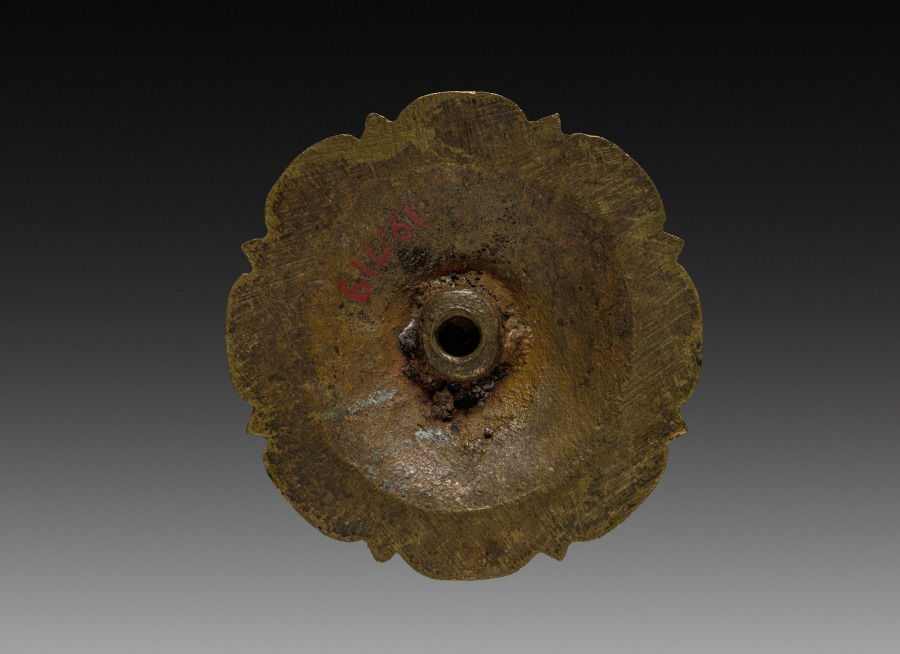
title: Ornamental Rosette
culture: France, late 18th - early 19th centuries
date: c. 1775–1825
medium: gilt bronze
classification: Metalwork